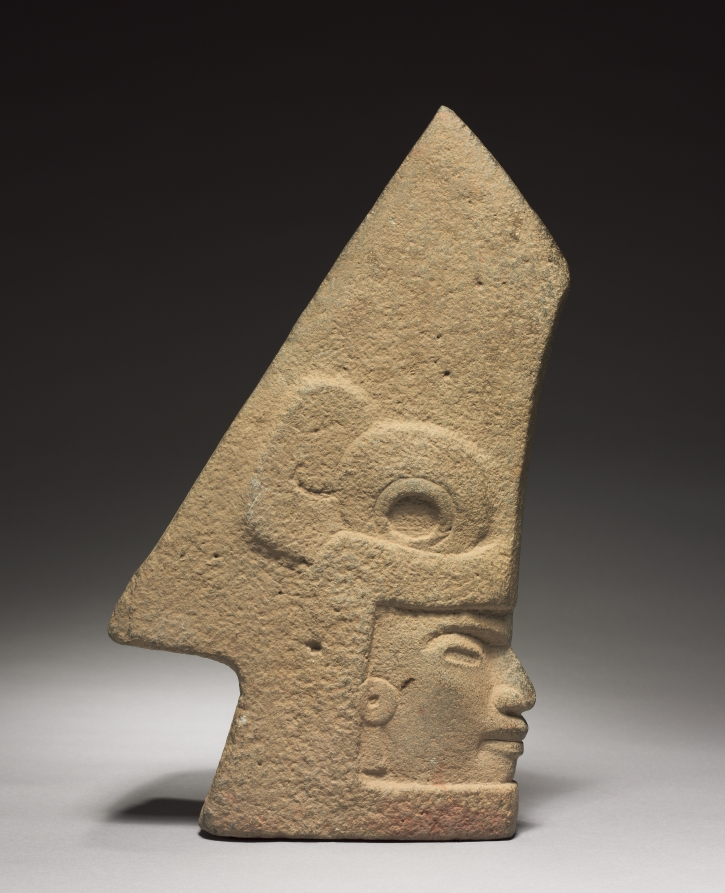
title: Hacha with Human Face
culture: Mexico, Veracruz, San Andres Tuxtla, late Classic period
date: 600–1000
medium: gray volcanic stone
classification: Sculpture